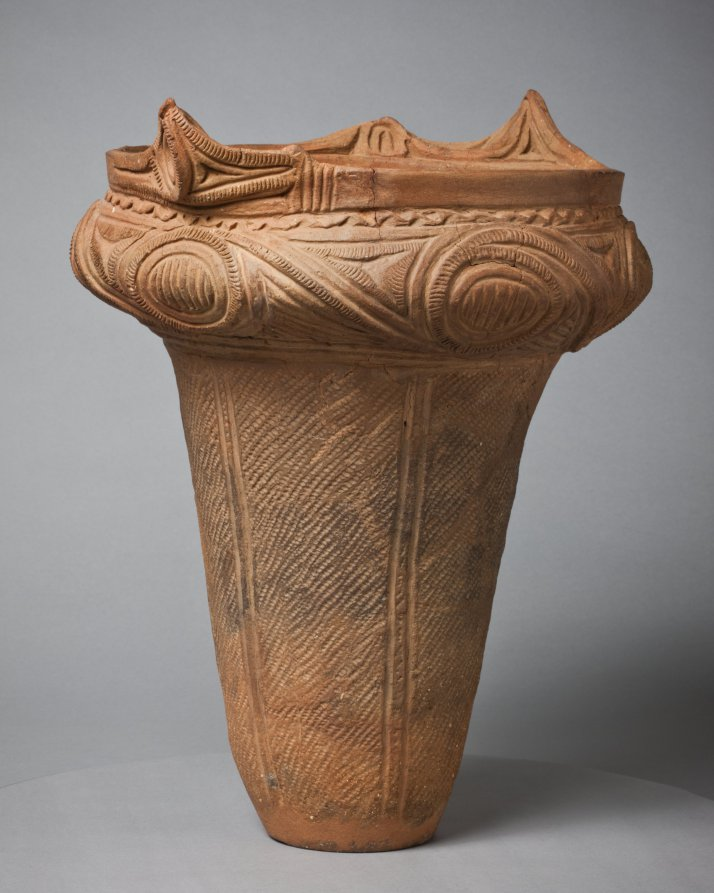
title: Urn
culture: Japan, Jōmon period (c. 10,500–300 BCE)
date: c. 2000 BCE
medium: earthenware, terracotta, impressed and incised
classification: Ceramic